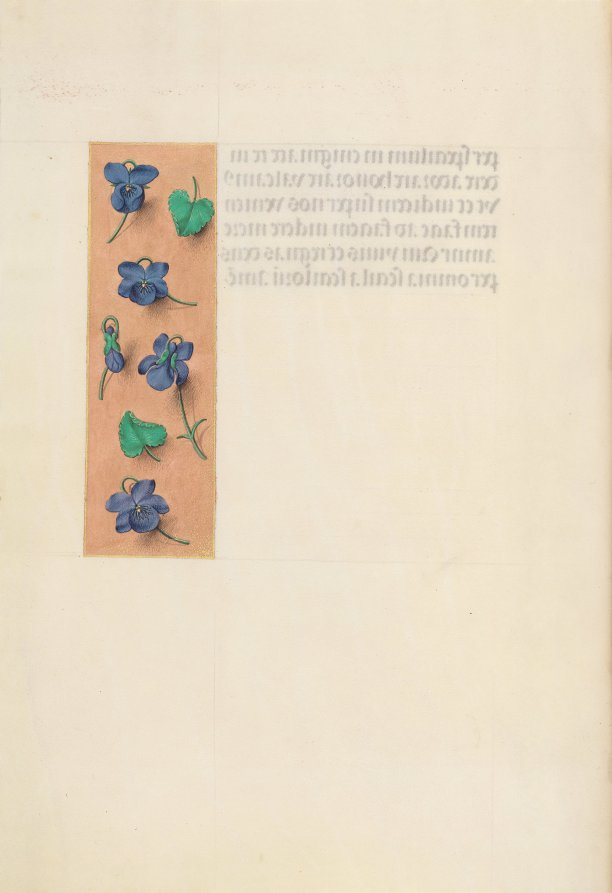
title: Hours of Queen Isabella the Catholic, Queen of Spain: Fol. 16v, Short Border with Strewn Violets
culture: Flanders, Ghent and Bruges, late 15th century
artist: Master of the First Prayerbook of Maximillian (Flemish, c. 1444–1519)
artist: and Associates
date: c. 1500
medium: ink, tempera, and gold on vellum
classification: Bound Volume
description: This manuscript was illuminated by a circle of at least five highly organized manuscript painters active in the Flemish cities of Ghent and Bruges. The principal illuminator was Alexander Bening, who painted the majority of the book's miniatures. Manuscripts produced by this circle of artists are renowned for the decoration of their borders, which typically feature a rich variety of realistically-painted flowers, birds, and butterflies. This prayer book, called a book of hours, was intended not for a cleric, but for the private devotions of a lay person-in this case, Isabella the Catholic, Queen of Spain (1451-1504). Isabella's coat of arms embellishes the book's frontispiece. It is unlikely that the book was commissioned by the Queen herself; rather, she probably received it as a diplomatic gift from someone courting her patronage, perhaps Cardinal Francisco Jimenez de Cisneros. A Franciscan friar, Jimenez was dependent upon Isabella for his advancement, first to the post of Queen's confessor in 1492, and then to Archbishop of Toledo in 1495.